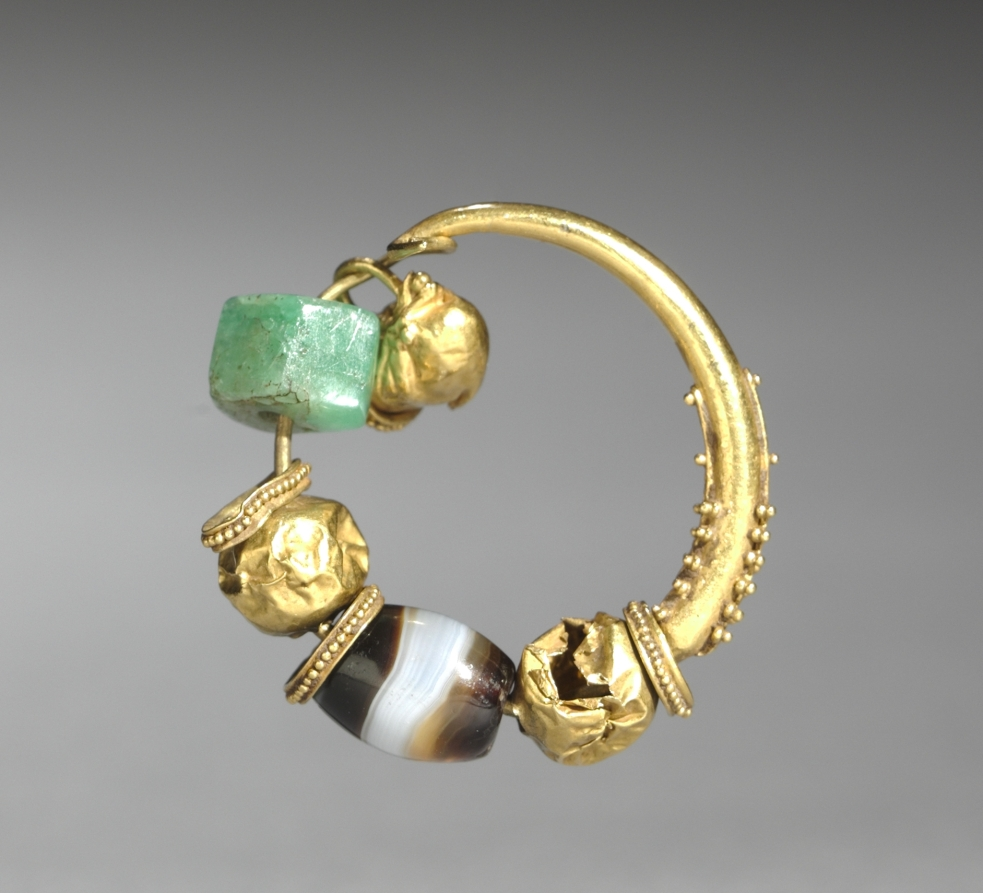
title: Earring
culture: Cyprus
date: 500–400 BCE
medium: gold and agate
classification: Jewelry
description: This earring is made of a simple gold loop with gold, agate, and feldspar beads strung on it. One of the gold beads is in the shape of a dolphin’s upper body with a small ball in its mouth. Earrings were extremely popular throughout the ancient Mediterranean, often decorated with animal heads like dolphins, bulls, and goats.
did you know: The use of agate in jewelry dates to the Indus Valley Civilization, between 3300 and 1300 BCE.